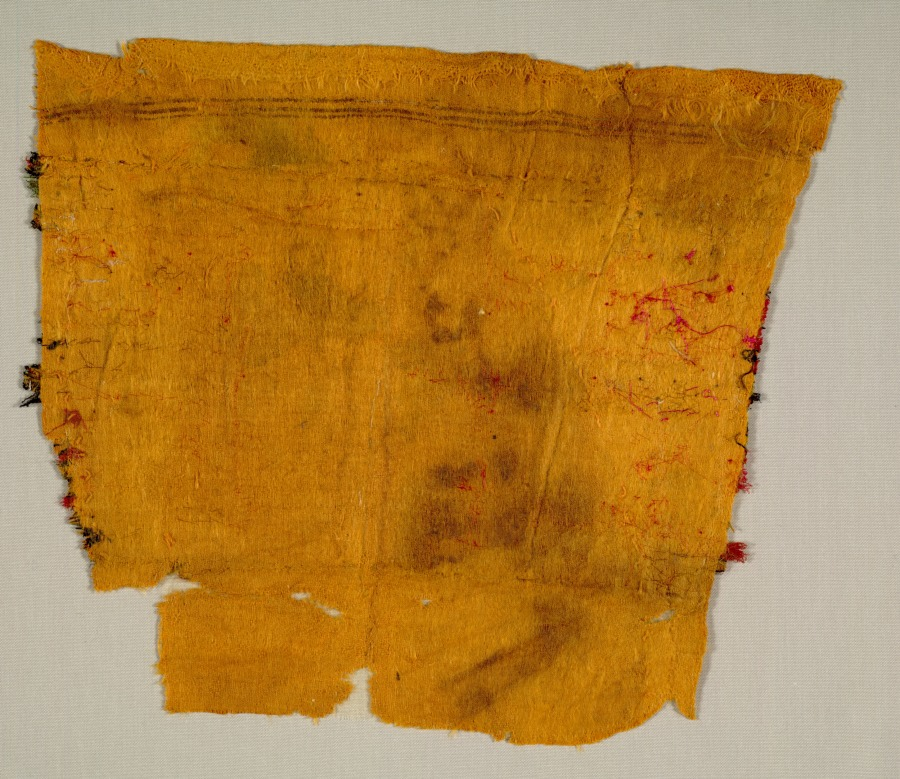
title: Sleeve from a Tunic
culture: Egypt, Umayyad period (661–750) or Abbasid period (750–1258)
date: 700s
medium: wool; plain weave with slit-tapestry weave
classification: Textile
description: Figures and winged animals from ancient Greece and Rome remained popular during the early Islamic period of the Umayyad and Abbasid dynasties. The naked figure could represent Dionysus, the Greek god of wine; he holds his thyrsus, a staff decorated with ivy leaves and pinecones, while pouring liquid from a small jug for the panther. These colorful designs probably adorned the sleeve and front or back of a tunic, a garment worn directly on the body for over 1,000 years, from Roman antiquity to the Middle Ages. Popular decorations were regularly reused and sewn onto new tunics, as can be seen on this winter garment made of wool.